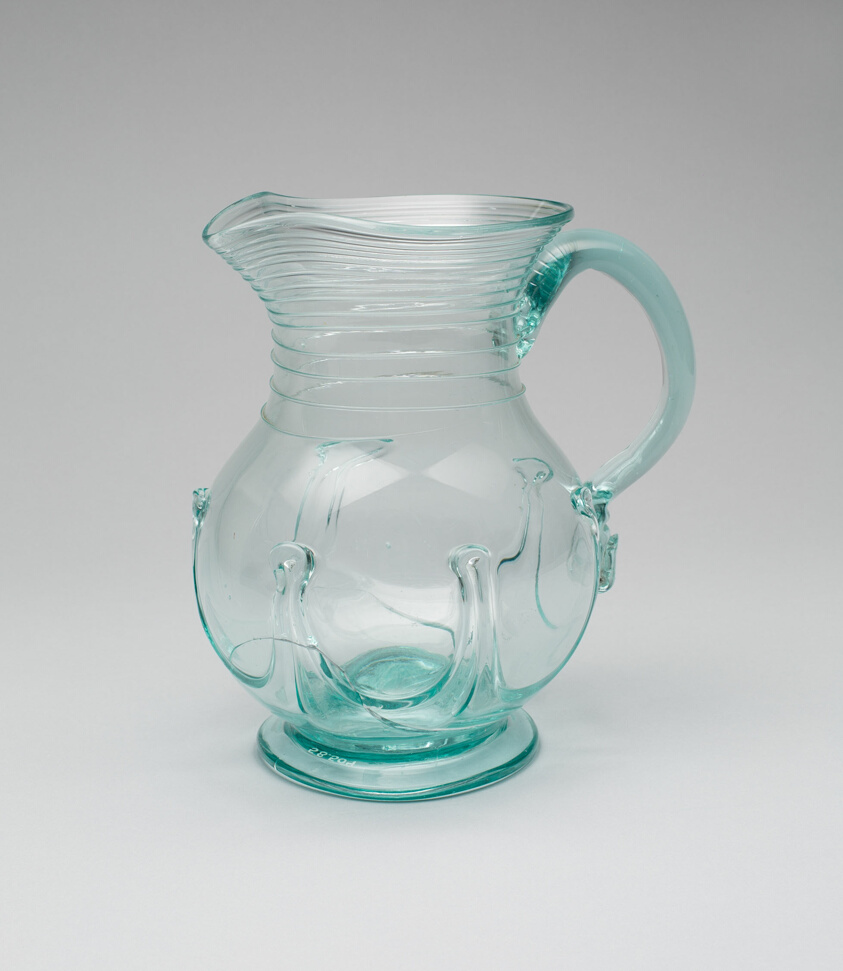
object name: Glass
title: Water Pitcher and Basin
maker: Possibly Redwood Glass Works; American, 1833–c.1880; Redwood, New York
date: 1833–42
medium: Glass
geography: New York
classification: pitcher (vessel); glass; american decorative arts; vessel; bowl; european decorative arts; decorative arts